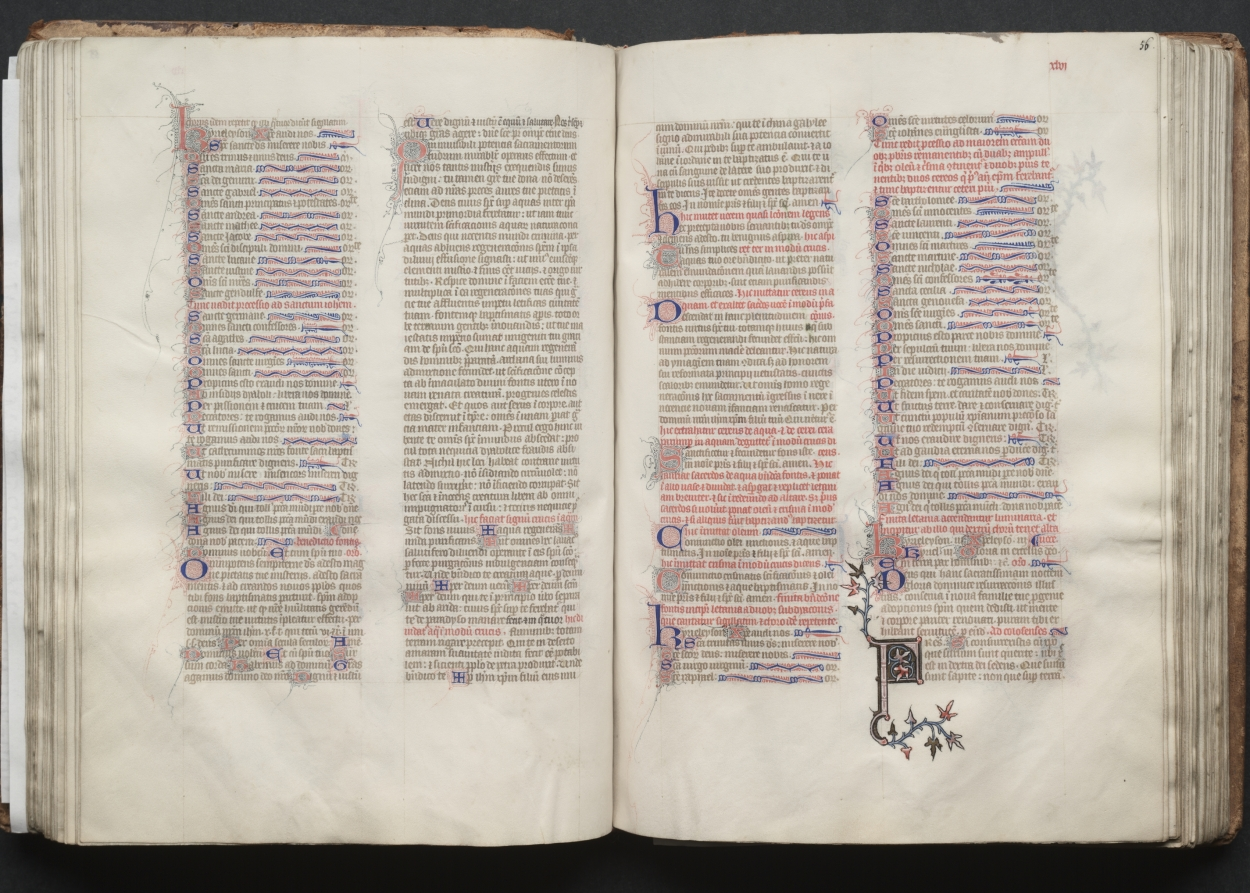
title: The Gotha Missal: Fol. 56r, Text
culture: France, Paris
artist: Master of the Boqueteaux (French)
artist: and Workshop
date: c. 1375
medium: ink, tempera, and gold on vellum; blind-tooled leather binding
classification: Bound Volume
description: The style and quality of this manuscript's decoration is typical of deluxe Parisian books made for aristocratic or royal patrons. Most of the book's decoration appears to be the work of the Master of the Boqueteaux, an artist active at the court of King Charles V (died 1380). His style was apparently shared by a number of book illuminators working in and around Paris. It is very possible that the Gotha Missal belonged to Charles V, but is not provable because the manuscript has no royal portraits and lacks a colophon. Given the book's magnificent decoration, however, it would seem that it was produced for a Valois prince, if not for the king himself. The manuscript receives its name from the German dukes of Gotha, its later owners.